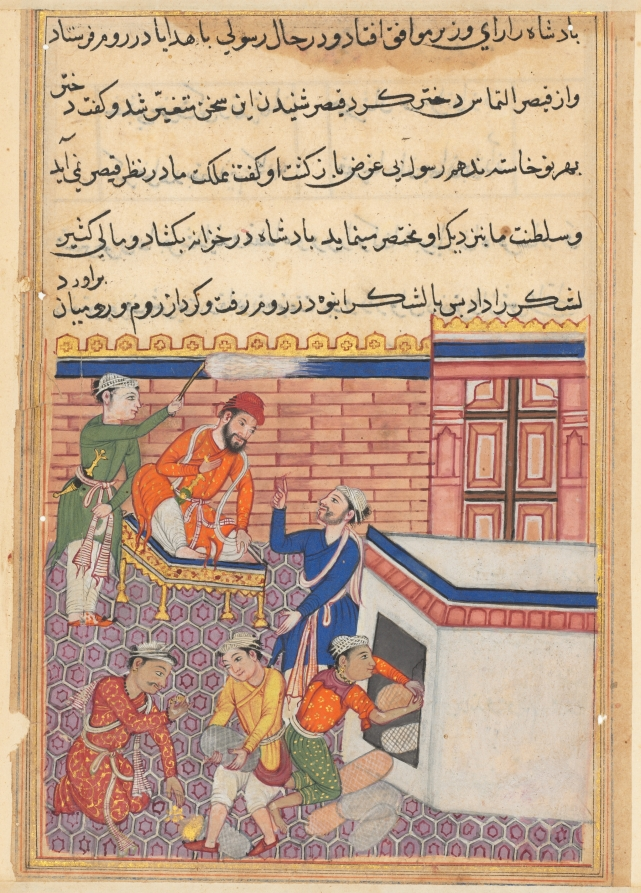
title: The king’s emissary being provided with gifts for his mission to Rum in order to seek the hand of the emperor’s daughter in marriage, from a Tuti-nama (Tales of a Parrot): Fiftieth Night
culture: Mughal India, court of Akbar (reigned 1556–1605)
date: c. 1560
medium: gum tempera, ink, and gold on paper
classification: Painting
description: In the background, the enthroned king addresses his emissary while members of his court collect wrapped bundles of goods. The king has conquered all surrounding lands and become indifferent as a result. His vizier suggests marriage to the princess of Rum, secretly hoping that the plan will spur the neglectful king to action.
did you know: The king’s attendant holds a flywhisk, called a chauri.